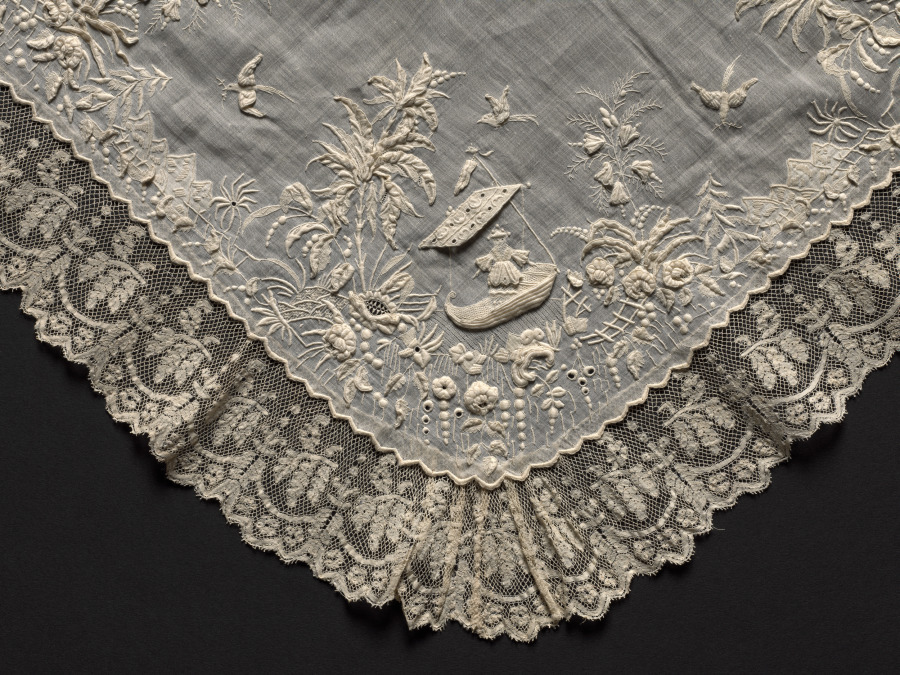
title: Lace Handkerchief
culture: Switzerland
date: 1857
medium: Plain weave linen center with bobbin lace (Valenciennes lace) edging and embroidery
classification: Embroidery